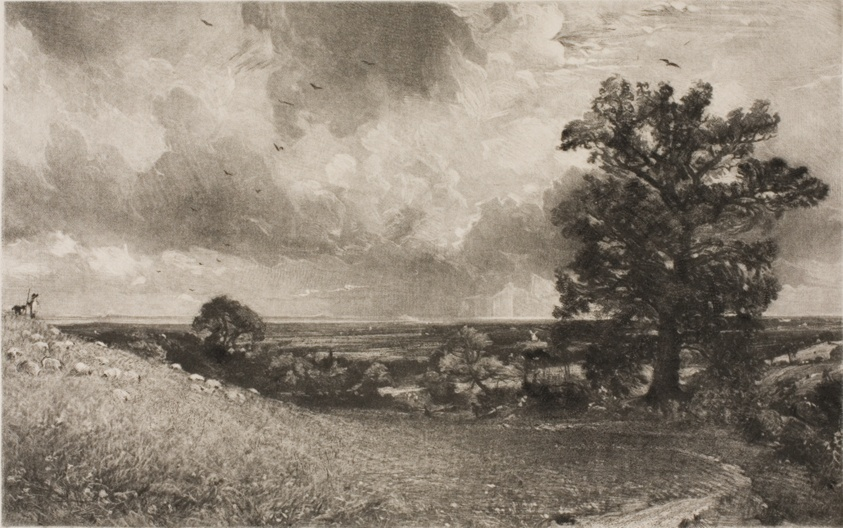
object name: Print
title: Noon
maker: David Lucas (English, 1802-1881); after John Constable (English, 1776-1837)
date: 1830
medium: Mezzotint in black ink on ivory wove paper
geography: England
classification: mezzotint; print; prints and drawing